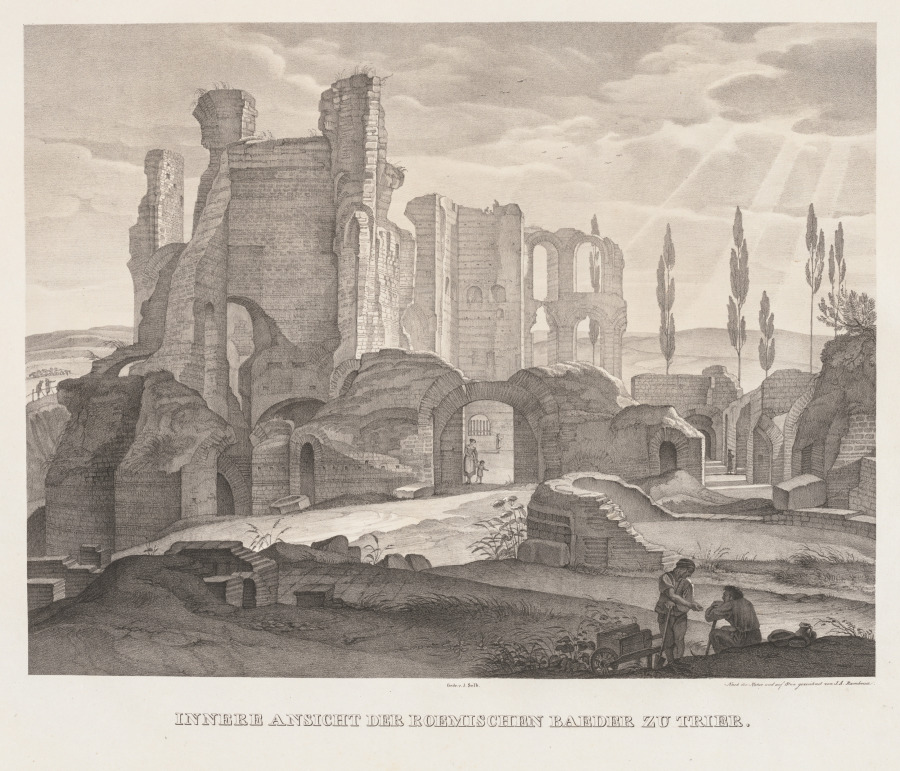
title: Interior View of the Roman Baths at Trier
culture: Germany, 19th century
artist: Johann Anton Ramboux (German, 1790–1866)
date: 1826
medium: lithograph with tint stone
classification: Print